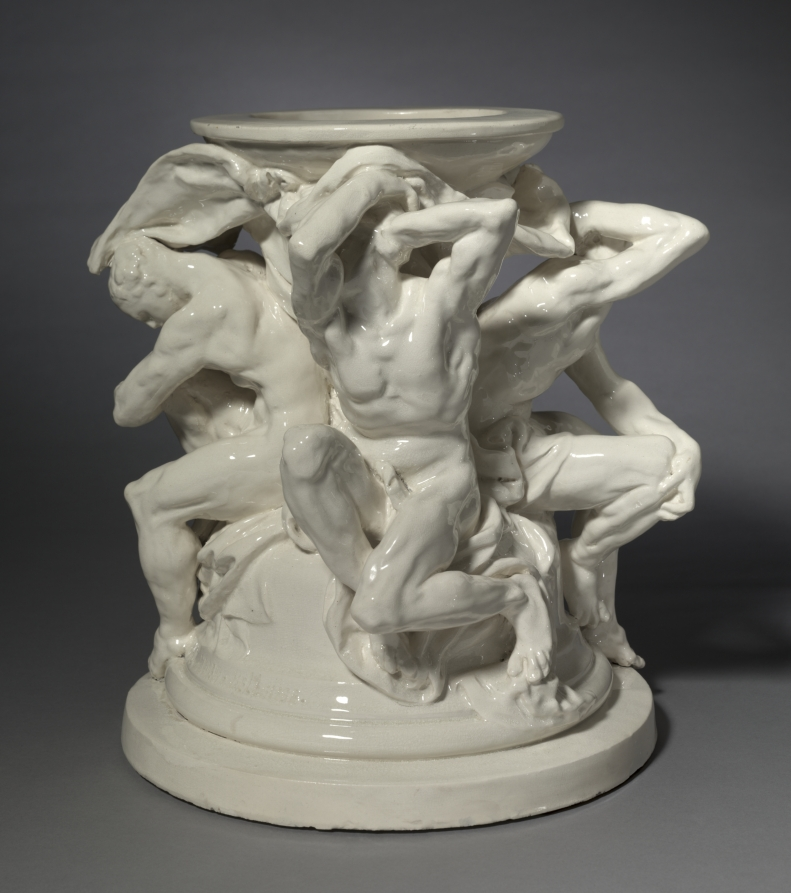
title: Titans, Support for a Vase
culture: France, made at Choisy le Roi, 19th century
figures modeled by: Auguste Rodin (French, 1840–1917)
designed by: probably by Albert-Ernest Carrier-Belleuse (French, 1824–1887)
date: c. 1877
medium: glazed earthenware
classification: Ceramic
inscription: incised near bottom of plinth: "A. CARRIERE-BELLEUSE."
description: During his lifetime and afterward, Auguste Rodin was viewed as the modern equivalent to Michelangelo. Rodin worked against the prevailing styles of his time and may have seen parallels between his own struggles and Michelangelo’s reputation in the 1800s as a suffering genius. In 1875 Rodin went to Italy to study Renaissance art, specifically works by Michelangelo. The twisting titans (giants) on this pedestal base are directly inspired by Michelangelo’s ignudi (male nudes) on the Sistine Chapel ceiling. Rodin did not directly copy the poses but translated the energy and movement of the nudes into new, three-dimensional forms.